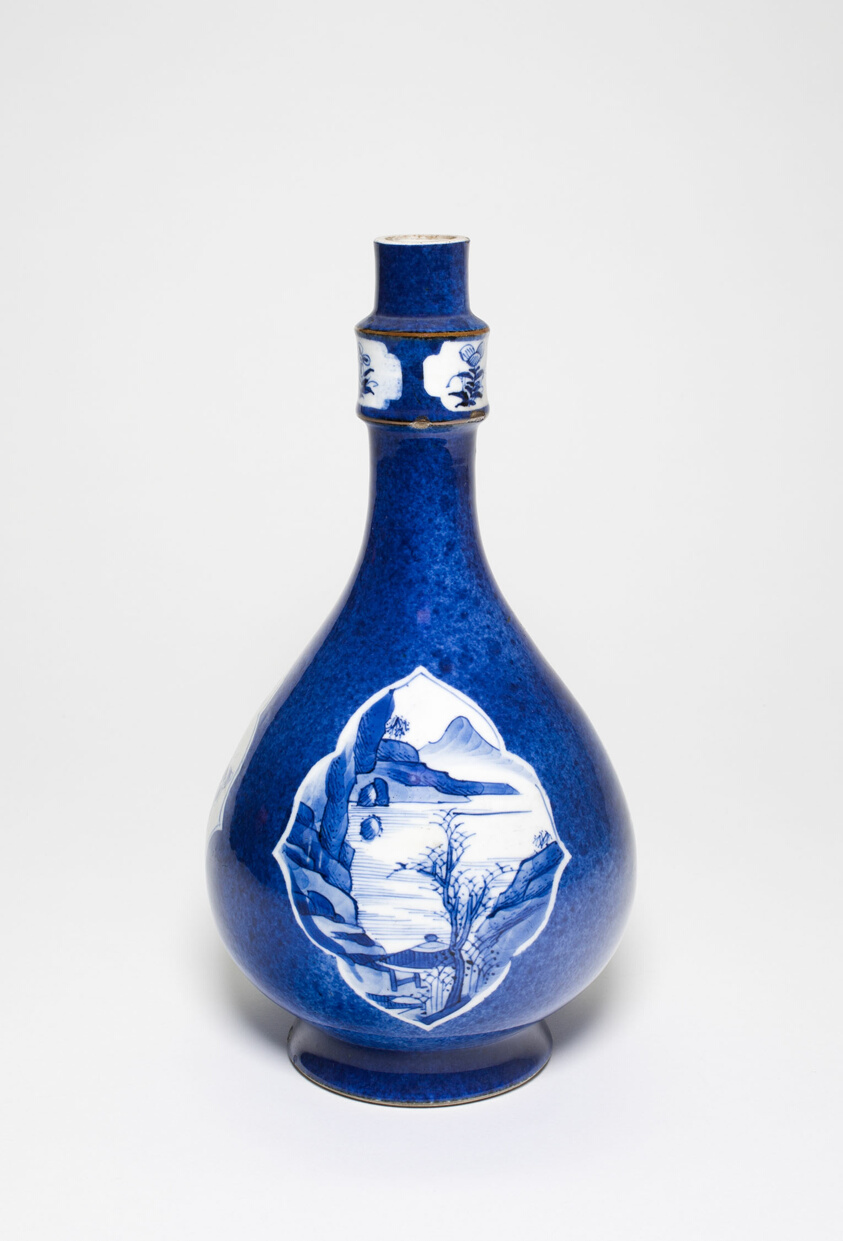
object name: Vessel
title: Pear-Shaped Vase with Buddhist Symbols and a Landscape Scene in Cartouches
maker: China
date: Qing dynasty (1644–1911), Kangxi period (1662–1722)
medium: Porcelain painted in underglaze blue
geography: China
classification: porcelain; asian art; ceramics